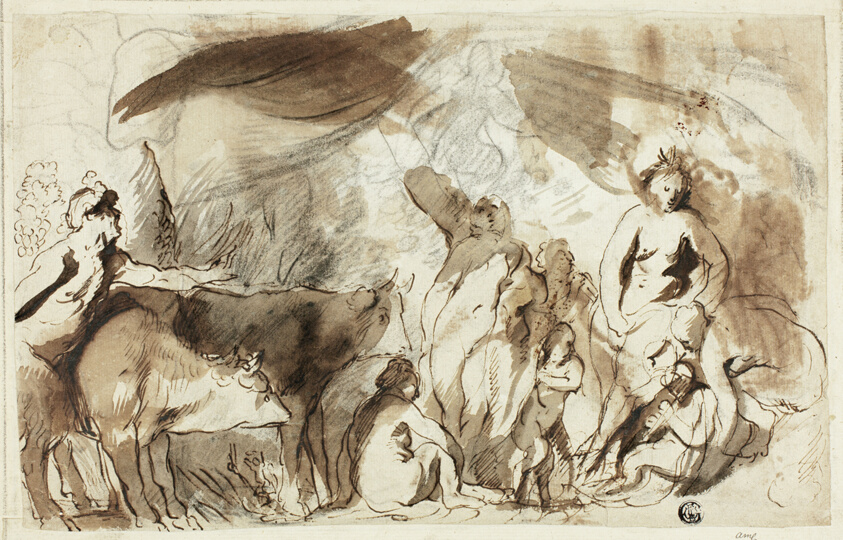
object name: Drawing and Watercolor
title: Study for the Sine Baccho et Cerere Friget Venus (recto); Family of Darius before Alexander (verso)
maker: Attributed to Jacob Jordaens; Flemish, 1593-1678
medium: Pen and black ink with brush and brown wash, over black chalk (recto), and brush and brown wash over black chalk (verso), on ivory laid paper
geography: Flanders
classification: pen and ink drawings; drawings (visual works); prints and drawing